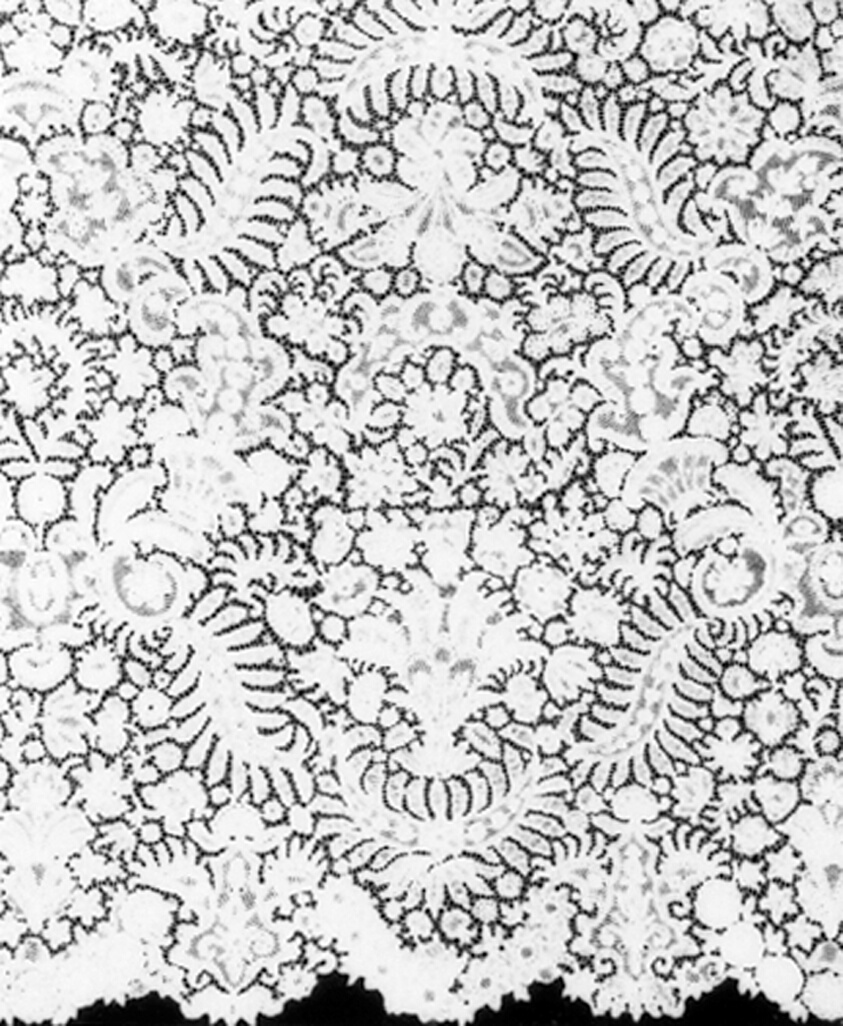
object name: Textile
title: Lace Flounce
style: 18th Century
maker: Brussels, Flanders (present day Belgium)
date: 1720–40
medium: Linen, bobbin part-lace of a type known as "Brussels" with a plaited bar ground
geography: Flanders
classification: textile; lace - bobbin; costume - lace